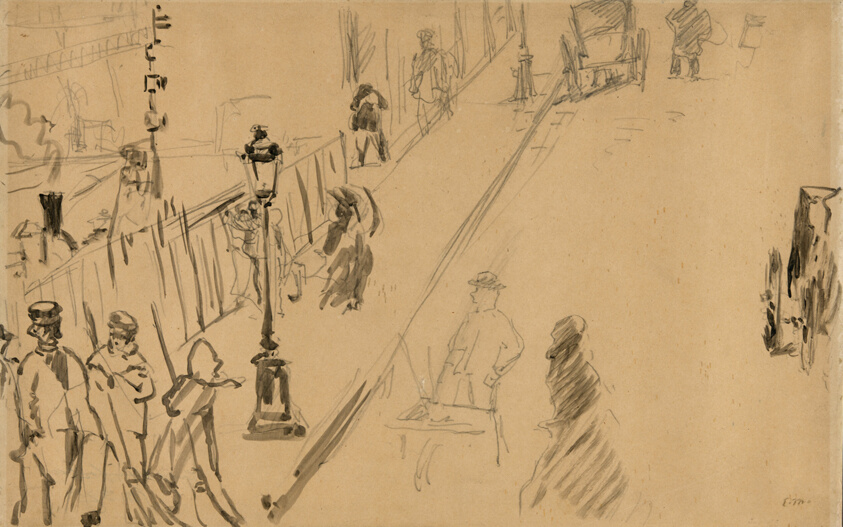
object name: Drawing and Watercolor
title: The rue Mosnier with Gas Lamp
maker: Édouard Manet (French, 1832-1883)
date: 1878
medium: Brush with tusche, over graphite on transfer paper, laid down on cream wove paper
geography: France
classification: pen and ink drawings; drawings (visual works); prints and drawing